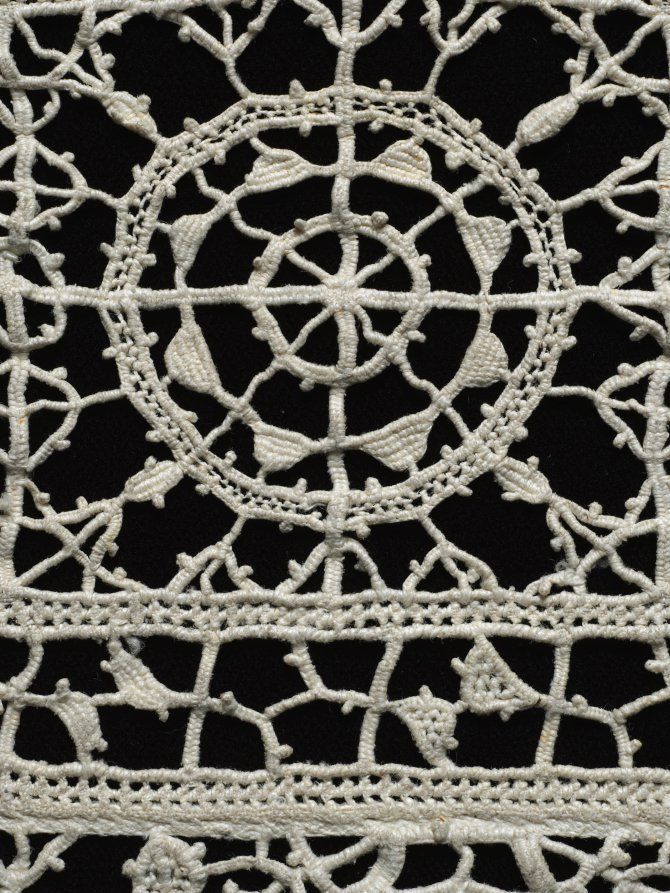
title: Lace Fragment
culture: Italy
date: 1500s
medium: Needle lace (reticella) insertion and edging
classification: Lace